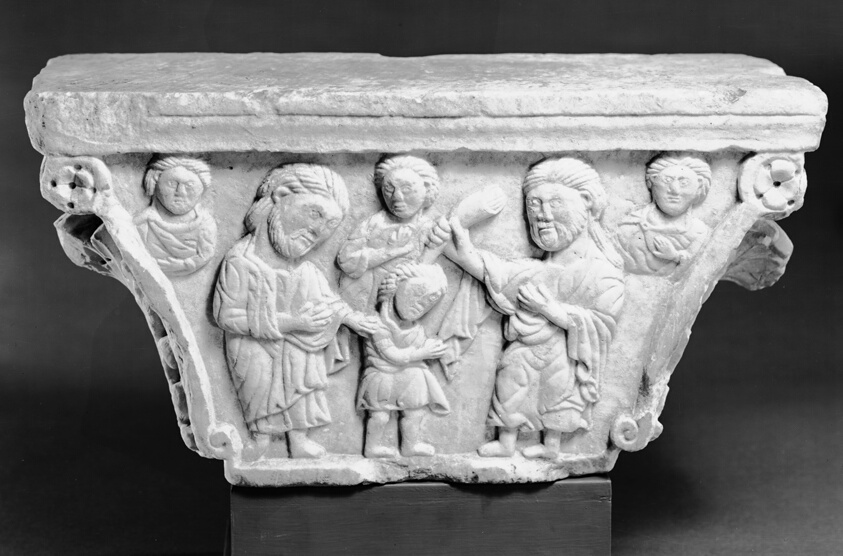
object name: Sculpture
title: Capital with Anointing of David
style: medieval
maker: Italian; possibly Lombardy or Tuscany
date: c. 1180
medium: Marble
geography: Italy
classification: architectural sculpture; sculpture; Italian; marble; sculpture/stone; stone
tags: architechture, architectural, architectural fragment, architectural fragments, architecture, architecture, biblical, religion, religious, religious figures, religious scenes